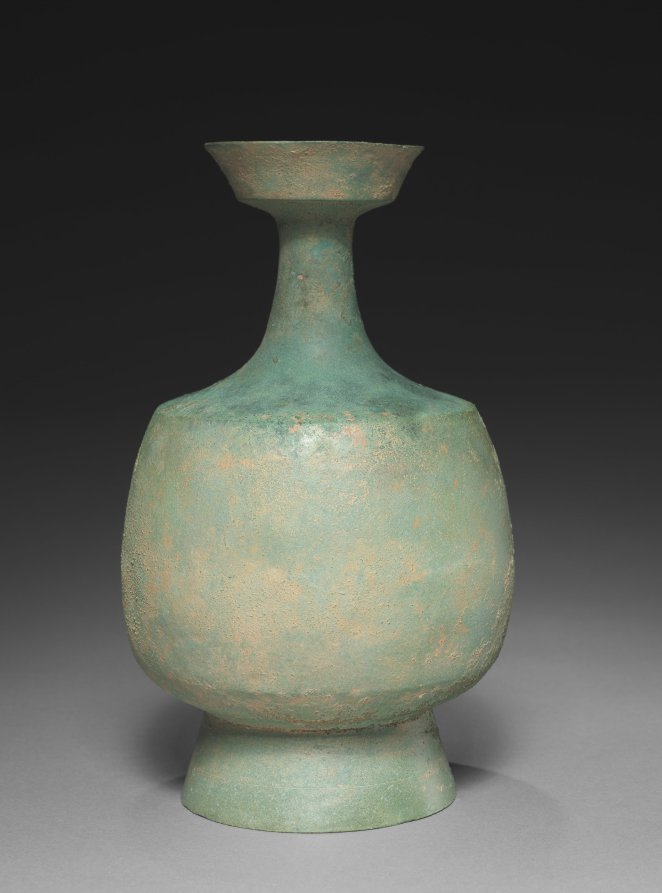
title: Wide-Mouthed Bottle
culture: Korea, Goryeo dynasty (918–1392)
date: 1100s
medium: bronze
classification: Metalwork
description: As early as the seventh century, the practice of drinking tea and wine became an important part of elite culture in Korea. Elites of the Goryeo period commissioned a variety of types of utensils and vessels made in both ceramic and bronze, including this handsome bronze wine bottle to make their drinking experience more exciting.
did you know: A bottle with a wide opening is one of the popular types for both bronze and celadon wares. Its ceramic counterpart is 1918.435.